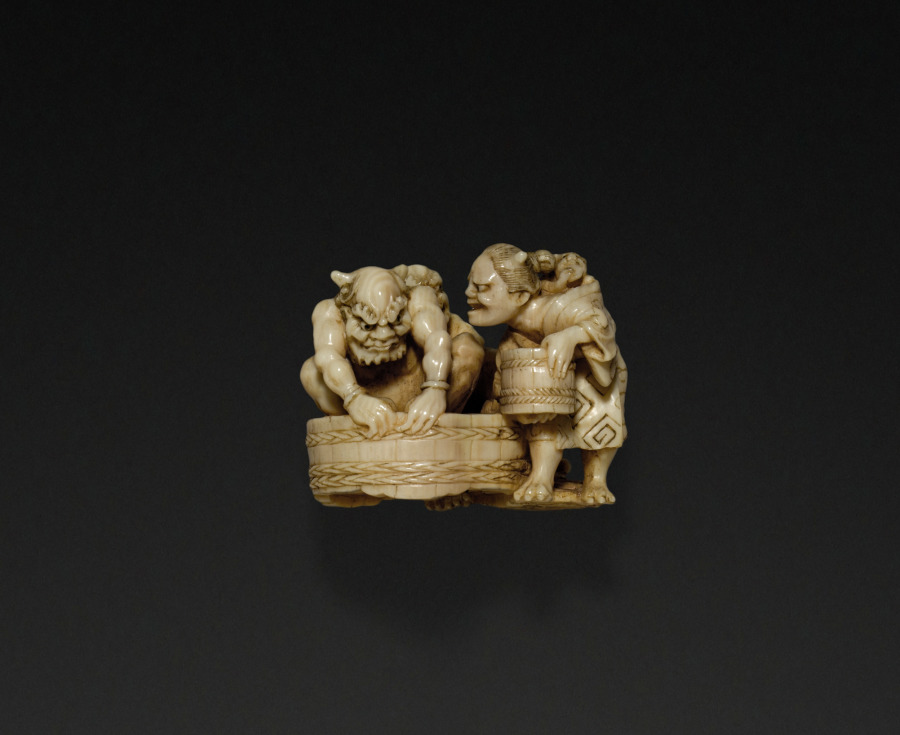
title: Netsuke with Demon Bathing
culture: Japan, Meiji period (1868–1912)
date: c. 1890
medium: ivory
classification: Netsuke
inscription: Signed: 玉秀